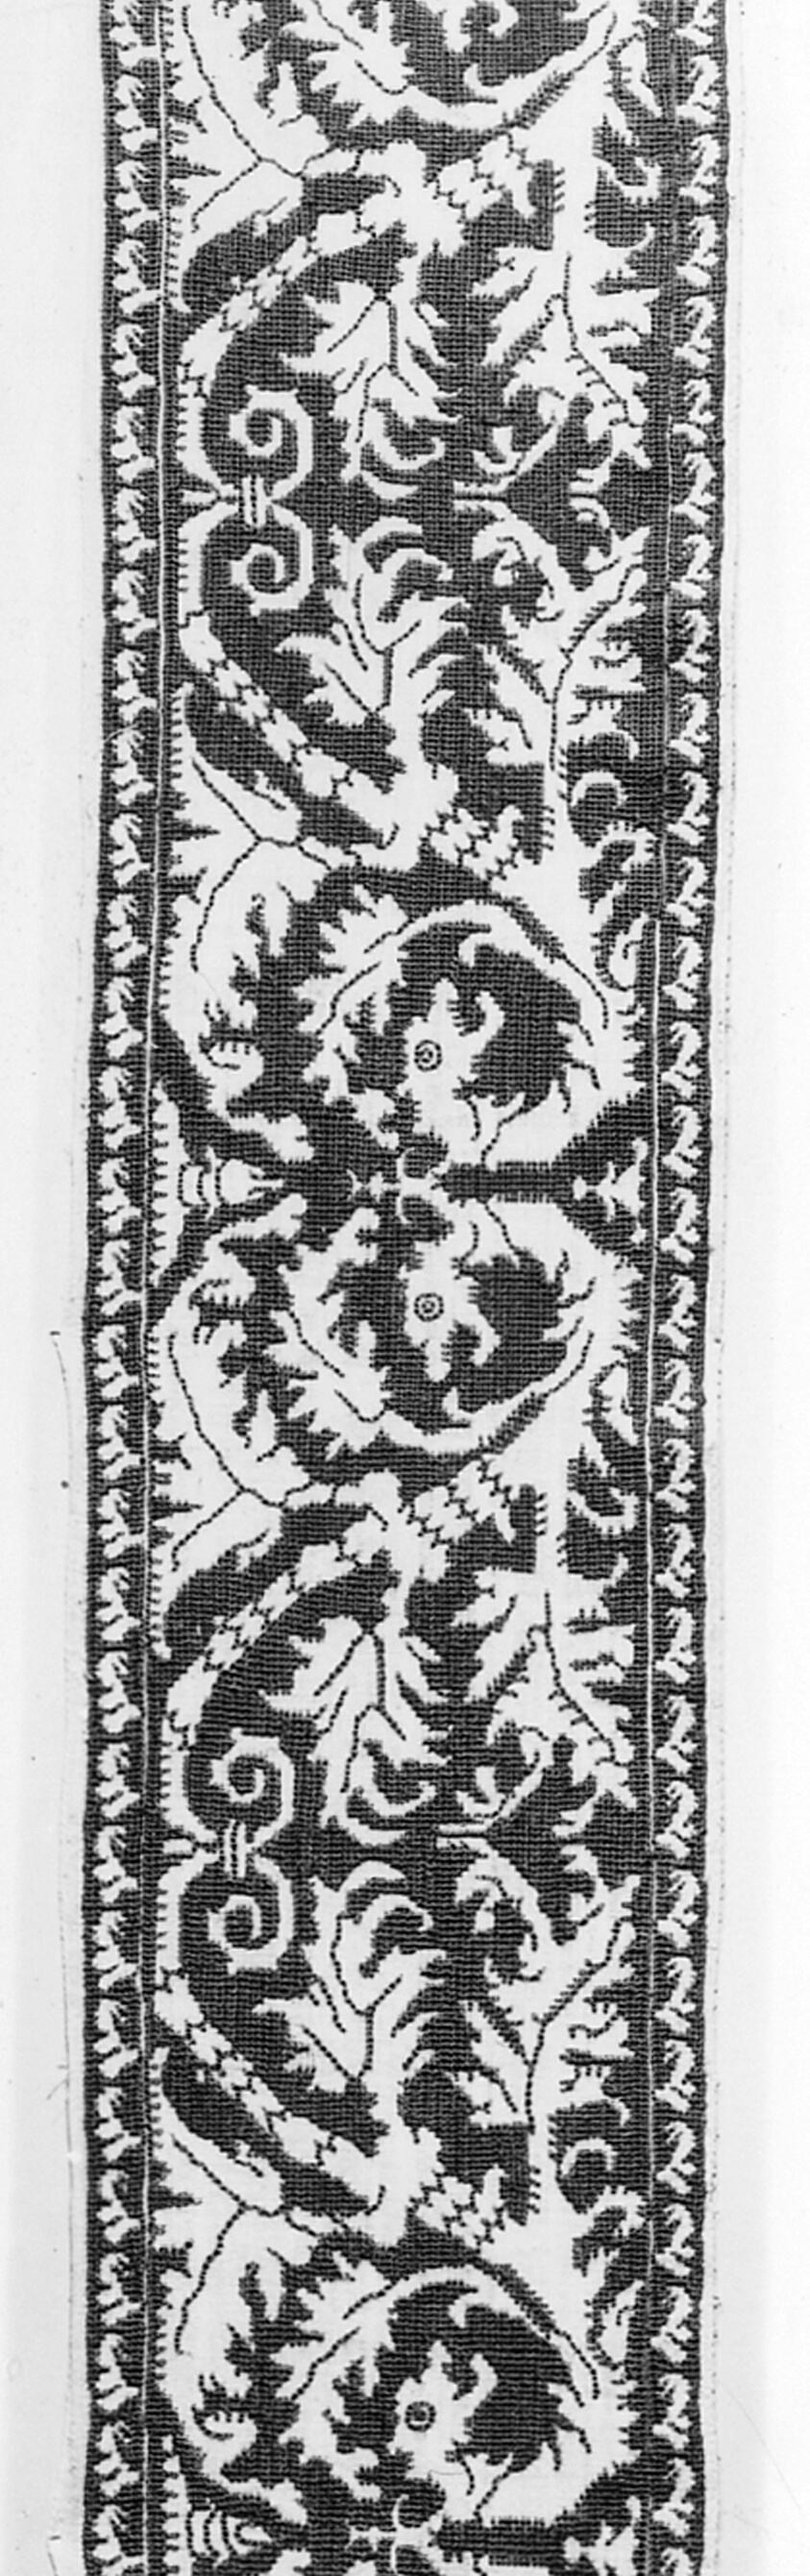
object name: Textile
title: Border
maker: Italy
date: 17th century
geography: Italy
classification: textile; needlework (visual works)